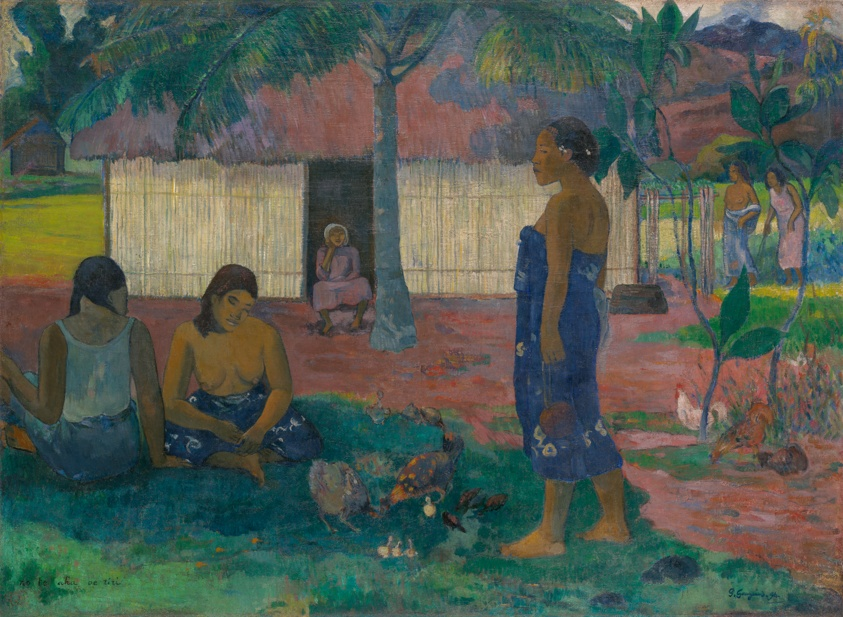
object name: Painting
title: No te aha oe riri (Why Are You Angry?)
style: Post-Impressionism, 19th century, nineteenth century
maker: Paul Gauguin (French, 1848–1903)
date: 1896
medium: Oil on jute canvas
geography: France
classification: painting; oil on canvas; oil paintings (visual works); paint; french; european painting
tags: women, birds, building, buildings, Chicken, foliage, French, nature, trees, woman, weather/seasons, leisure, landscapes, everyday life (genre), circles, mysteries/fantasies, Century of Progress, world's fairs, Chicago World's Fairs